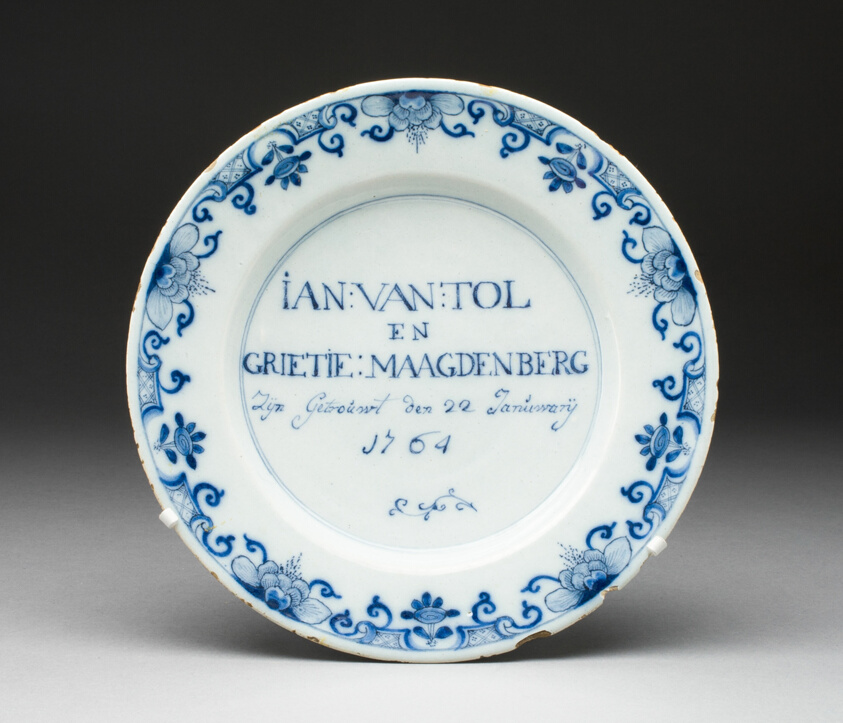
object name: Ceramics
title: Plate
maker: Delft, Netherlands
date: 1764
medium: Tin-glazed earthenware (Delftware)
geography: Delft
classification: plate (general, dish); dish (vessel); earthenware; ceramics; european decorative arts